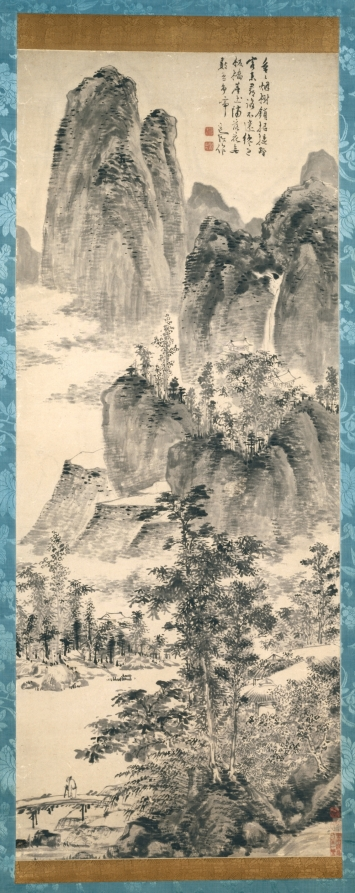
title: Looking for a Monastery in the Misty Mountains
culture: China, Ming dynasty (1368–1644)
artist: Chen Chun (Chinese, 1483–1544)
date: 1500–1544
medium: hanging scroll, ink on paper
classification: Painting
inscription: Artist's inscription, signature, and 2 seals: Row after row of misty trees envelop the Buddhist Monastery./ But the rustic who comes to find it will not lose his way./ Just across the wooden bridge, the dusty world is cut off;/ Among the countless falling petals, birds are singing confusedly. Daofu 道複 composed [this]. [seals] Fufu shi 復甫; Baiyang shanren 白陽山人. trans. WKH/LYSL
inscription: 3 additional unidentified seals.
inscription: 1 additional unidentified seal on the back of the mounting.